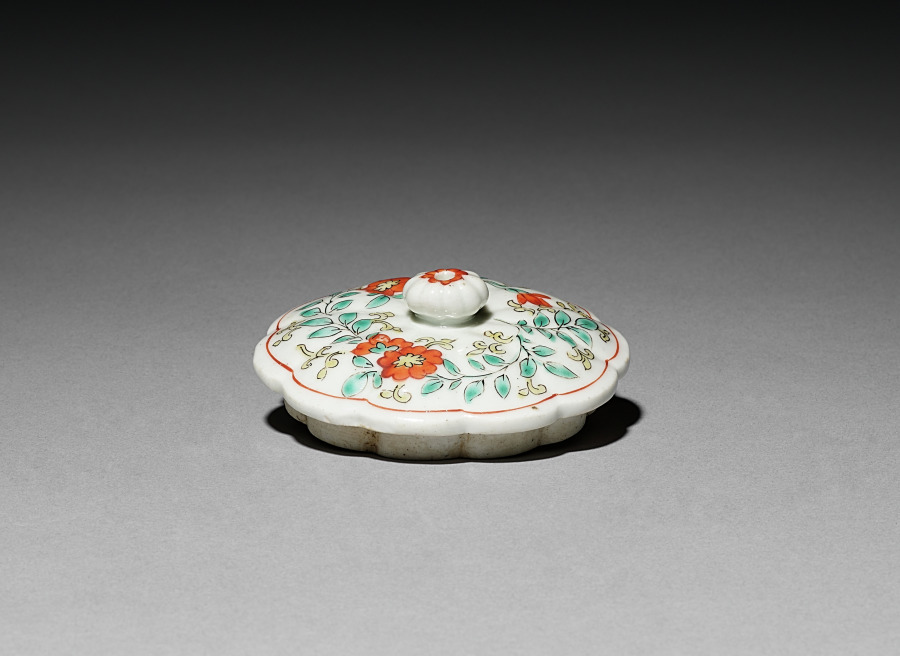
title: Teapot with Birds and Flowers (lid)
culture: Japan, Edo period (1615–1868)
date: 1700s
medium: Porcelain with overglaze color enamel (Arita ware)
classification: Ceramic